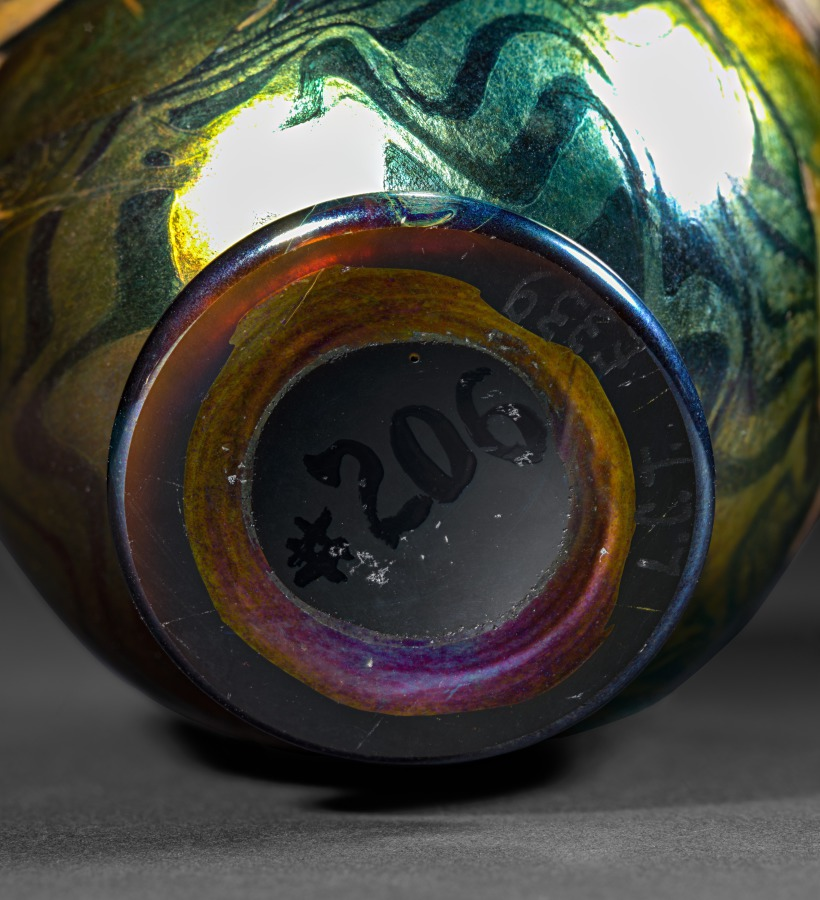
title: Cypriot Vase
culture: America, New York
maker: Tiffany Glass & Decorating Company (America, New York, 1892–1902)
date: c. 1895–1900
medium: Favrile glass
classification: Glass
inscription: engraved on underside: L.C.T. 5339 #206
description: This small vase is an example of Louis Comfort Tiffany's signature Favrile glass. It was made in the style of ancient glass from Cyprus that Tiffany had admired for the iridescent color and encrusted texture of the surface caused by oxidation while buried for many years. Tiffany had noticed these qualities in ancient glass exhibited at the Metropolitan Museum of Art and at his father's store, Tiffany & Co., in New York. When Tiffany began collaborating with artisans on new types of glass production in the 1880s, his aesthetic ambitions were realized in the development of Favrile glass, deliberately named to sound French, expensive, and “handmade.” Largely through Tiffany's marketing ability, Favrile glass became America’s greatest contribution to the Art Nouveau style. His works were exhibited at international expositions; galleries in major European cities, where his creations were bought by many museums; and in his store in Manhattan, known as the Tiffany Glass and Decorating Co., later Tiffany Studios. From the outset, Tiffany used Favrile glass in mosaic panels, stained glass windows, and his artistic line of table and floor lamps.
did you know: Louis Comfort Tiffany took inspiration from the ancient glass artifacts found in the collection of the Metropolitan Museum of Art in New York.